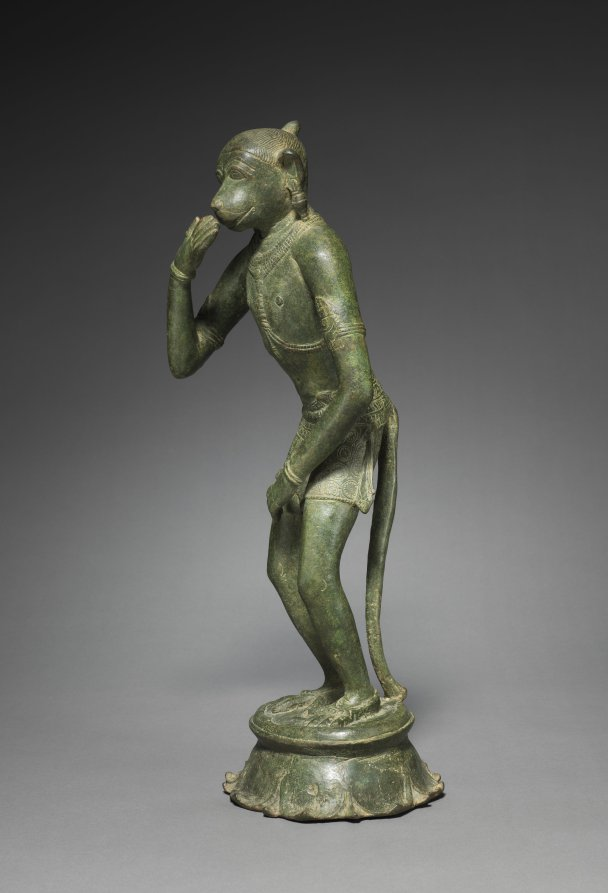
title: Monkey General Hanuman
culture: Southern India, Chola period (900s–1200s)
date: c. 1000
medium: bronze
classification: Sculpture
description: Hanuman is one of the most popular heroic figures of the epic Ramayana. In the story, he was indispensable in the search for the abducted wife of Rama, an incarnation of Vishnu. He is able to fly through the air and lift mountains, but here he is shown as a humble servant of the god. His gestures signify his humility and he bows slightly in reverence to his master. Bronzes during the Chola period spanning the 800s to 1200s were solid cast, using the lost-wax method. Each one is unique and would have been kept in the treasury of the temple until the festival day when the presence of the deity is invited to reside in the sculpture, which is then bathed, dressed, and paraded through the streets. This figure would have been paraded with a group of other images depicting Rama, his wife, and his brother.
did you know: Hanuman stands on a lotus pedestal with slightly upturned petals.